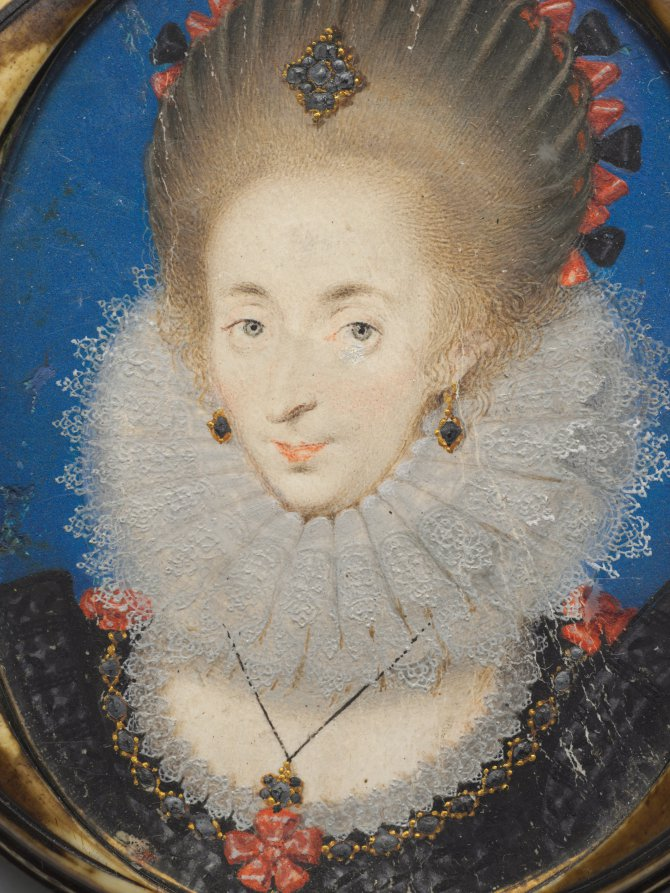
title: Portrait of Lucy Russell, Countess of Bedford, née Harrington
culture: England, 17th century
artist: studio of Isaac Oliver (French, c. 1565–1617)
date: 1612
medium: watercolor on vellum with gold and silver in original stained ivory case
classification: Portrait Miniature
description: Although the identity of the lady is uncertain, she must have been a wealthy woman, judging by her heavy and elaborate jewelry, complete with necklace, chain, earrings, jewel-encrusted dress and a kind of aigrette in her hair. In an age when clothes were assumed to be an accurate indicator of status, it was judged essential to wear your wealth, especially when immortalized in a portrait. Oliver painted the woman's pearl earrings using Nicholas Hilliard's jewelling technique, which involved laying a raised blob of white lead paint with some shadowing to one side. This form was then crowned with a rounded touch of real silver that was burnished with, to quote Hilliard, "a pretty little tooth of some ferret or stoat or other wild little beast." This technique brought the silver to a sparkling highlight, while actual gold is used to paint the pearl's gold setting. Silver tarnishes with age, therefore, the pearl earrings now appear black.